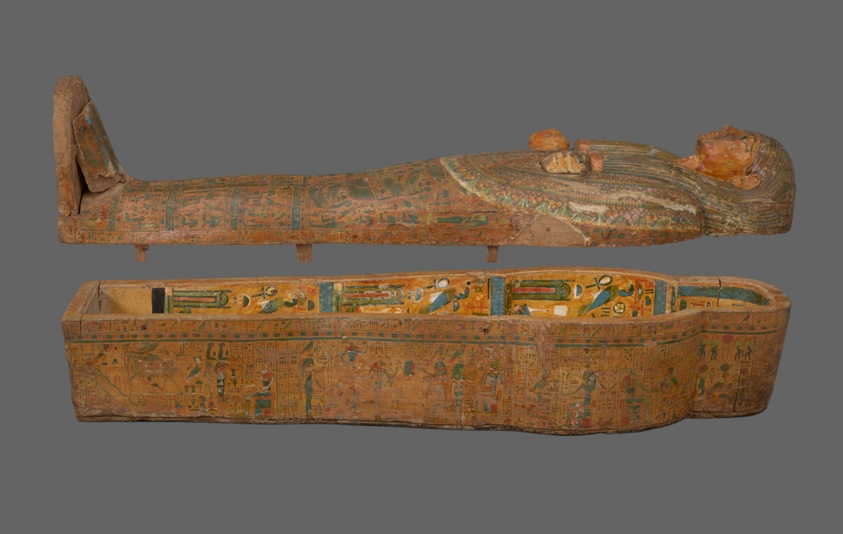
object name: Funerary Object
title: Coffin of Nespahertahat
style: twenty-first dynasty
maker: Egyptian; possibly Deir el-Bahri, Thebes (now Luxor), Egypt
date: Third Intermediate Period, Dynasty 21 (about 1069 –945 BCE)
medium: Wood and pigment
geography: Ancient Egypt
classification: coffin; ancient art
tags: funerary art